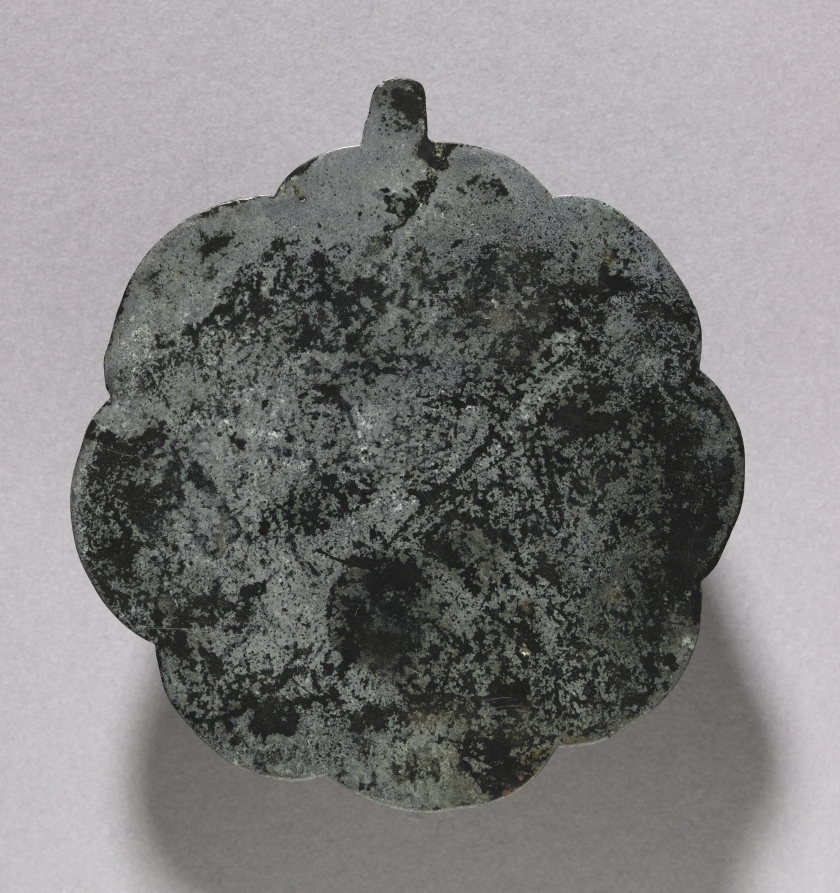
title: Flower-shaped Mirror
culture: Korea, Goryeo dynasty (918–1392)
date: 1100s-1200s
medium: bronze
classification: Metalwork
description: From ancient times, a mirror assumed various roles; a ritualistic tool, a diplomatic gift, and a luxury commodity. During the Goryeo dynasty (918-1392), which saw the great advancement of metallurgy, the royal court was the center of distributing sophisticated bronze artifacts. According to historical records, on the 7th day of the Lunar New Year, the king bestowed a bronze mirror inscribed with auspicious symbols upon each court official as part of a ceremony to celebrate the Day of Humans. This explains why a large quantity of bronze mirrors were excavated from elite tombs.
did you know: Due to its origin as an important tool in religion and politics, mirrors are often mentioned in many Korean proverbs that warn certain behaviors.